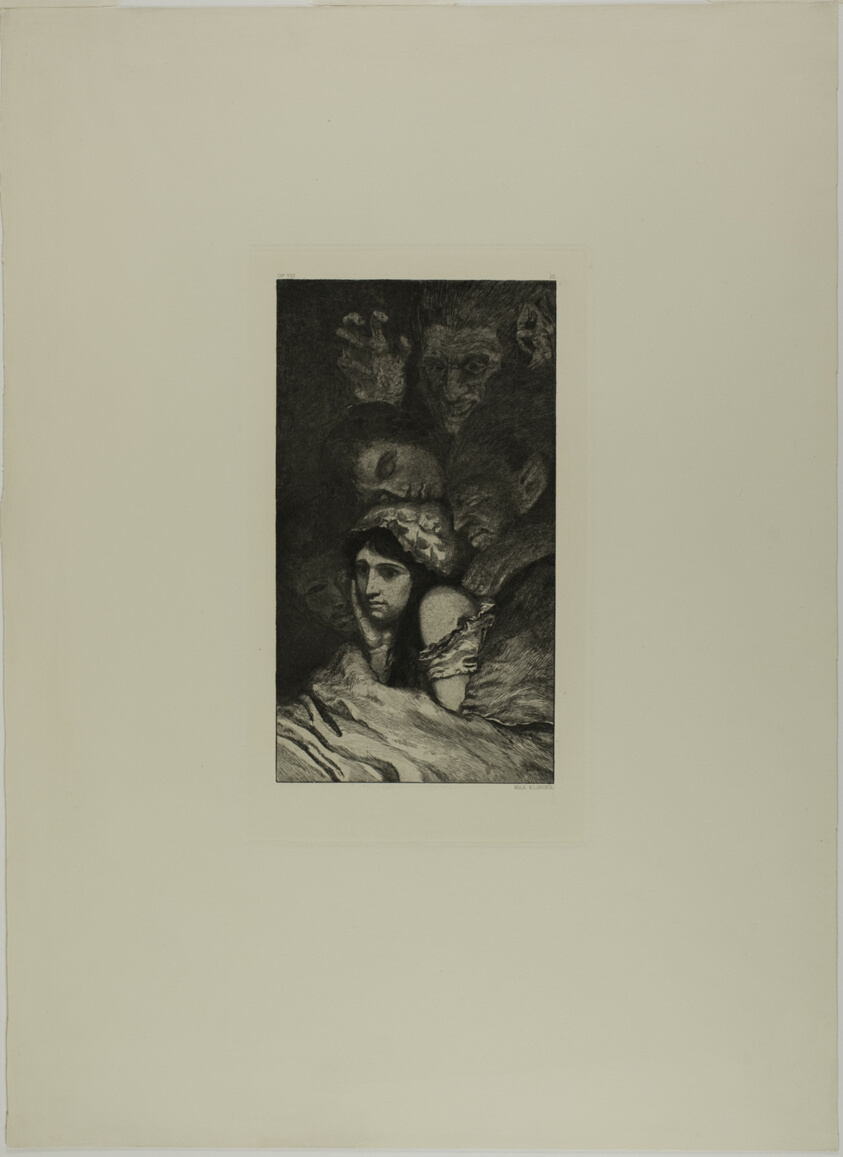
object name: Print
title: Dreams, plate three from A Life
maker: Max Klinger (German, 1857-1920)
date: 1884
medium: Etching on cream wove paper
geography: Germany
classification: etching; print; prints and drawing